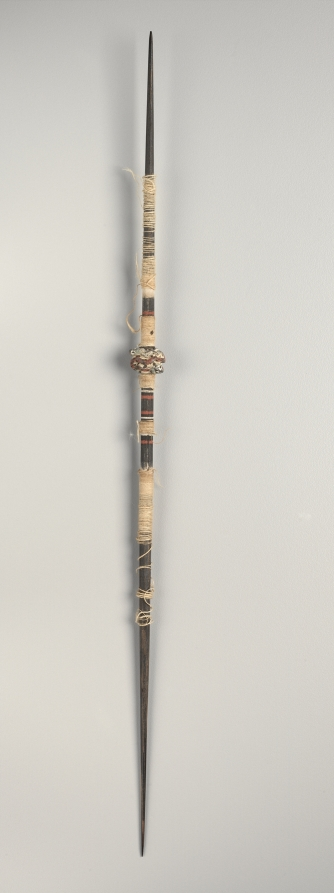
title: Spindle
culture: Peru, South Coast, Nasca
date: c. 1–399 CE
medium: wood with carved clay whorl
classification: Spindle Whorl